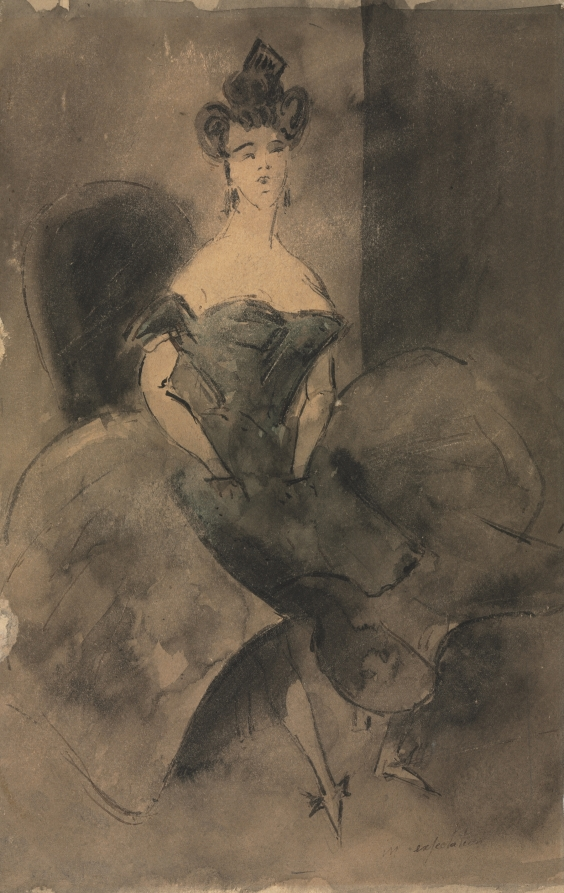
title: In Expectation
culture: France, 19th century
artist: Constantin Guys (French, 1805–1892)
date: 1800s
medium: pen and black ink and brush and black ink and black, gray and green wash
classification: Drawing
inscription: by artist?, lower right, in brown ink: [e?]n expectation ; VERSO OF SECONDARY SUPPORT, lower center, in graphite: 98 18